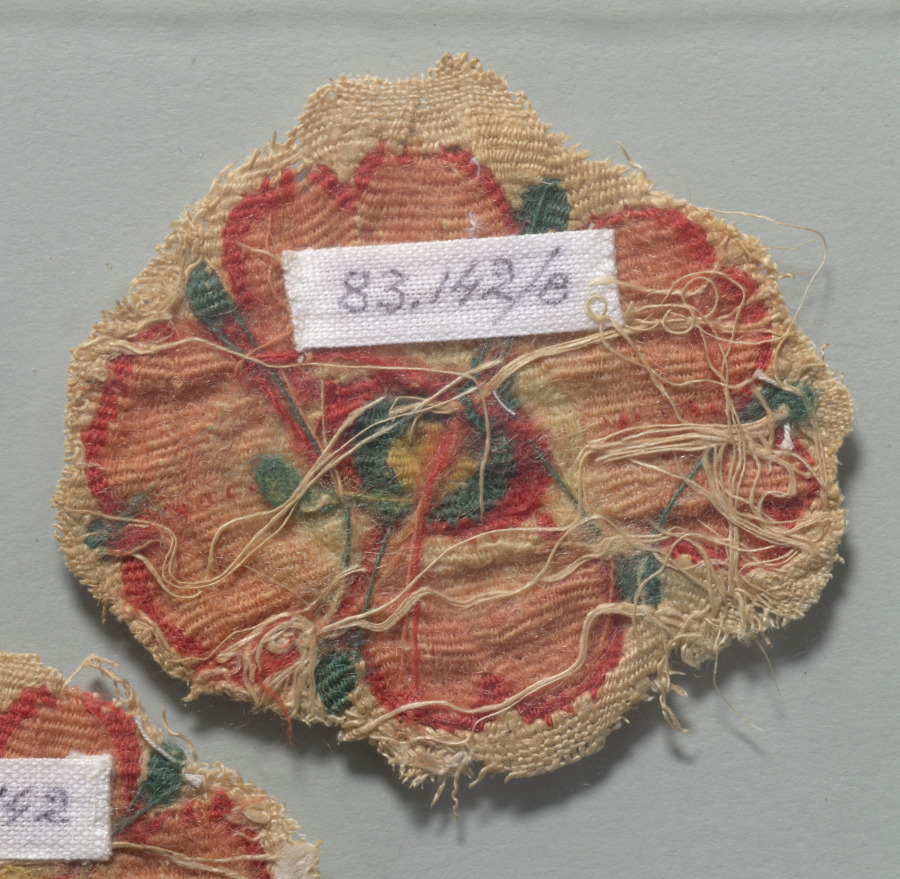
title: Fragments from a Curtain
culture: Egypt, Byzantine period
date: 300s–500s CE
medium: tapestry (originally inwoven in tabby ground, applied to plain tabby linen); linen and wool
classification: Textile